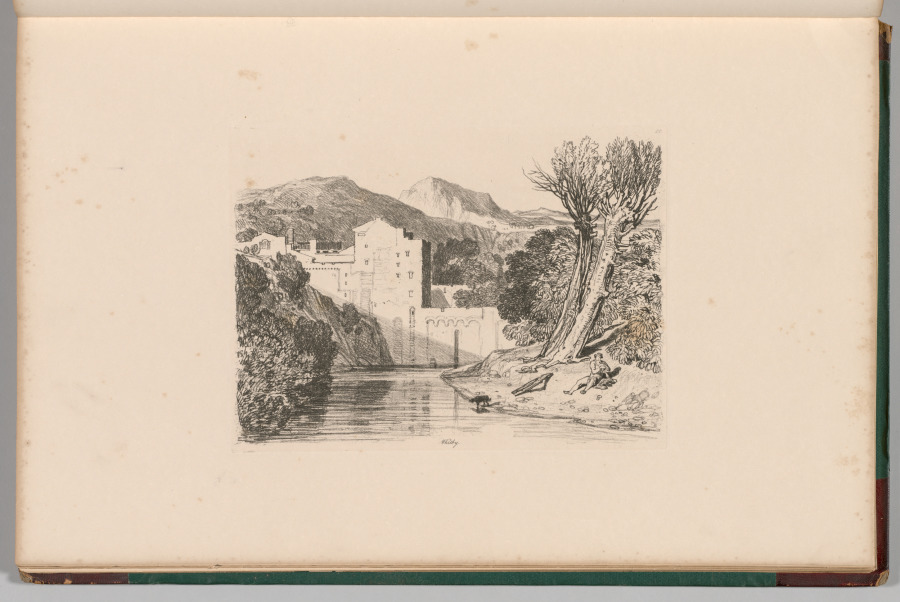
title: Liber Studiorum: Plate 22, Whitby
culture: England, 19th century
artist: John Sell Cotman (British, 1782–1842)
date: 1838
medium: softground etching, from a bound volume containing 48 plates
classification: Bound Volume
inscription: In plate, within image, upper right: 22; in plate, below image: Whitby